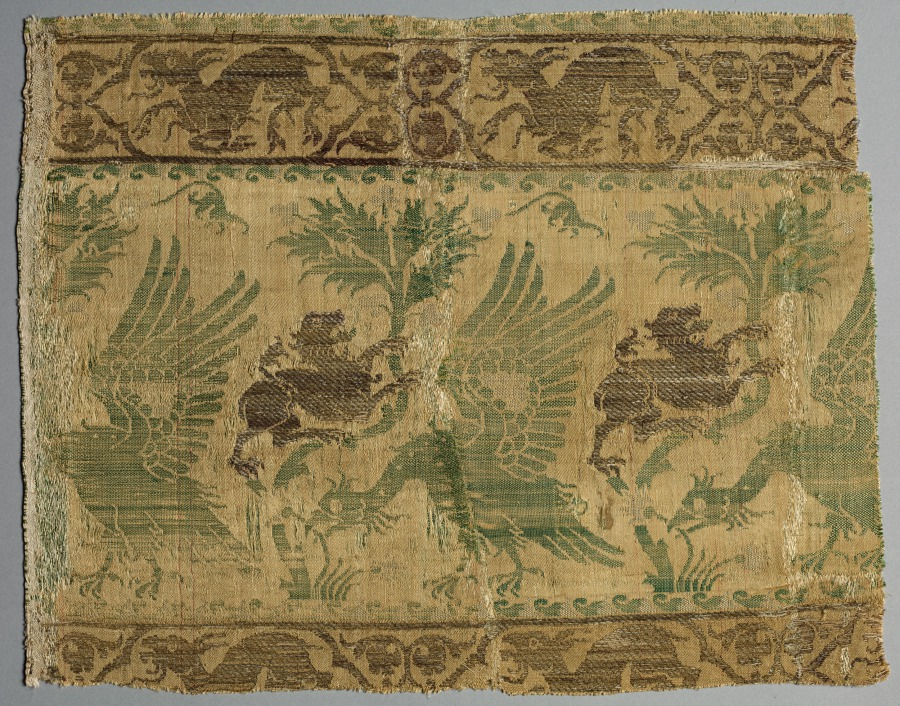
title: Silk and Gold Textile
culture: Italy, last third of the 14th century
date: 1360–1400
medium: lampas weave, silk and gold thread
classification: Textile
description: Lucca, Venice, Florence, Bologna, and Genoa are known to have been the principal silk weaving cities in Italy during the 14th and 15th centuries. It is not possible, however, to distinguish which silks were woven in each city. Silks like these were sold to royalty, nobility, and churches throughout Europe by Italian merchants in Bruges, Antwerp, Paris, London, and Avignon.